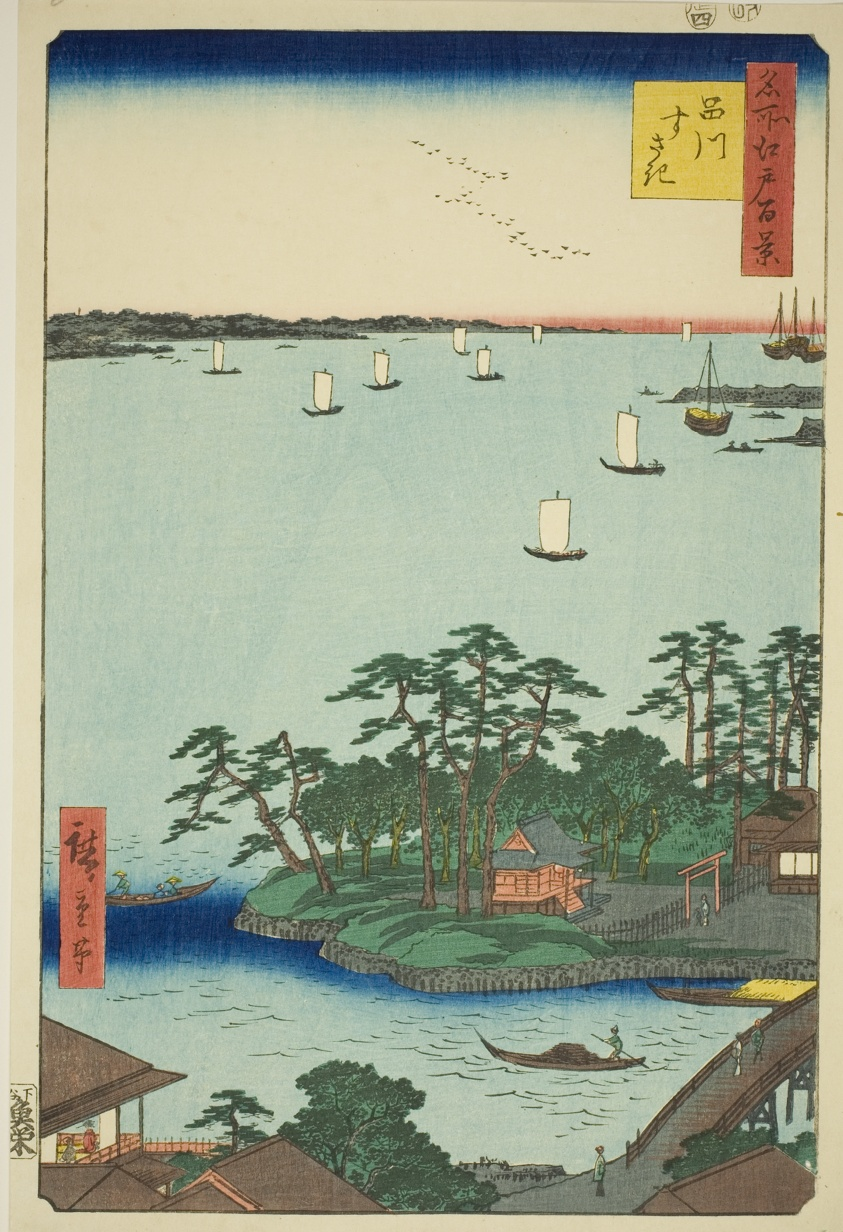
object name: Print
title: Shinagawa Susaki (Shinagawa Susaki), from the series "One Hundred Famous Views of Edo (Meisho Edo hyakkei)"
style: Japanese (culture or style)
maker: Utagawa Hiroshige 歌川 広重; Japanese, 1797-1858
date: 1856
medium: Color woodblock print; oban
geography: Japan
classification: woodblock print; print; asian art